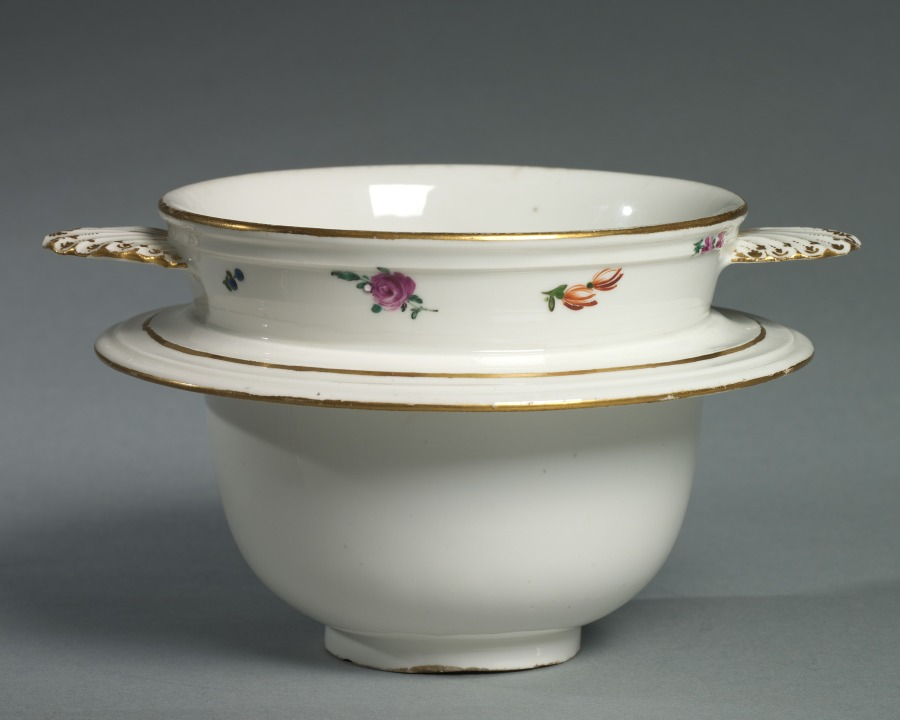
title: Food Warmer (Veilleuse) [Food Container]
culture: Germany, Nymphenburg, 18th century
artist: Meissen Porcelain Factory (German, est. c. 1710)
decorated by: probably by Georg Christoph Lindemann (German)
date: c. 1758– 1760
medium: porcelain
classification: Ceramic